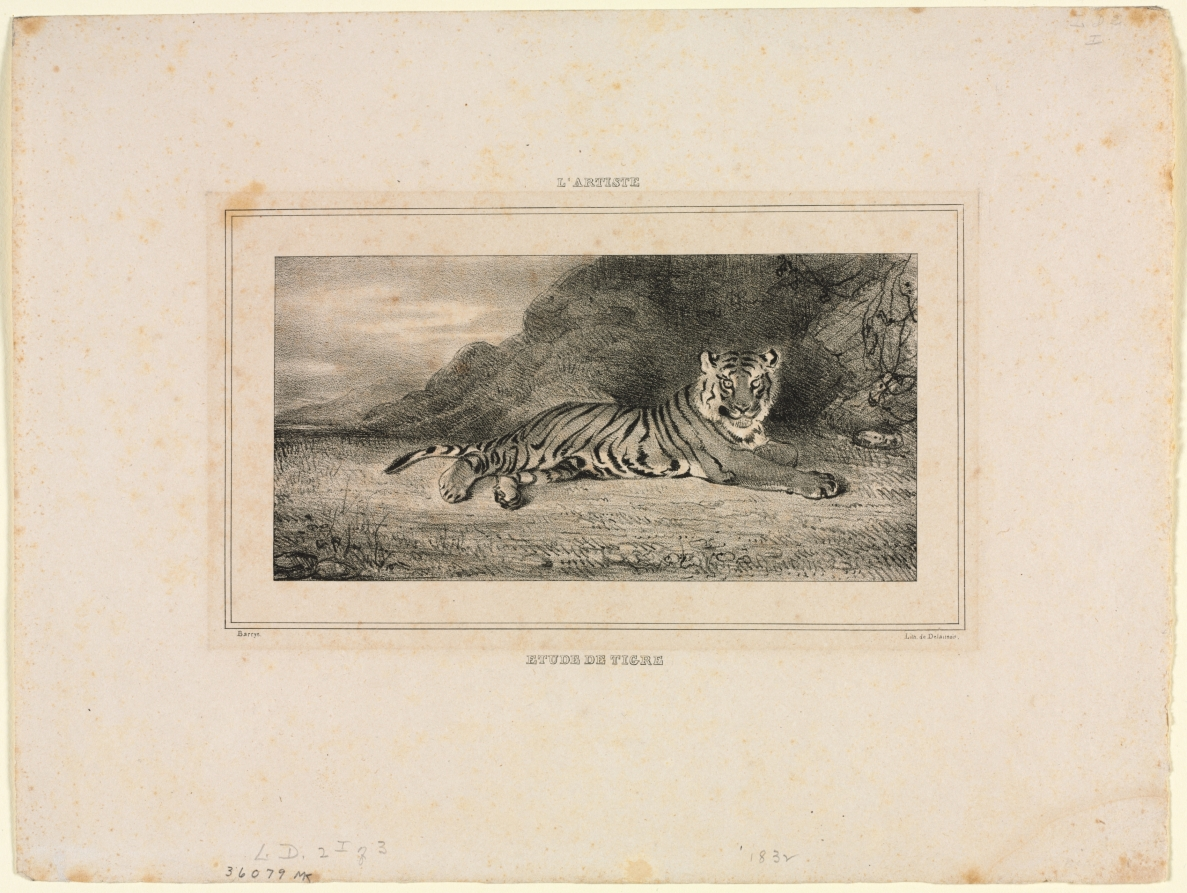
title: Study of a Tiger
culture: France, 19th century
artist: Antoine-Louis Barye (French, 1796–1875)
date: 1832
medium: lithograph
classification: Print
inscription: lower left, on stone: Barrye upper center: L'Artiste lower center: Etude de tigre